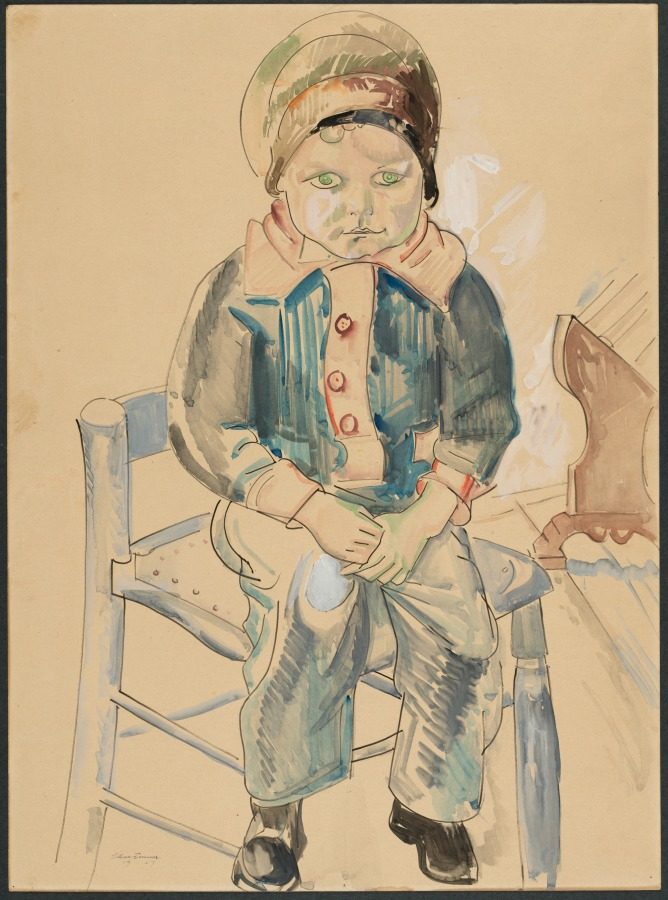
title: Boy on a Chair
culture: America, Ohio, Cleveland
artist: William Sommer (American, 1867–1949)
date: 1927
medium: watercolor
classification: Drawing